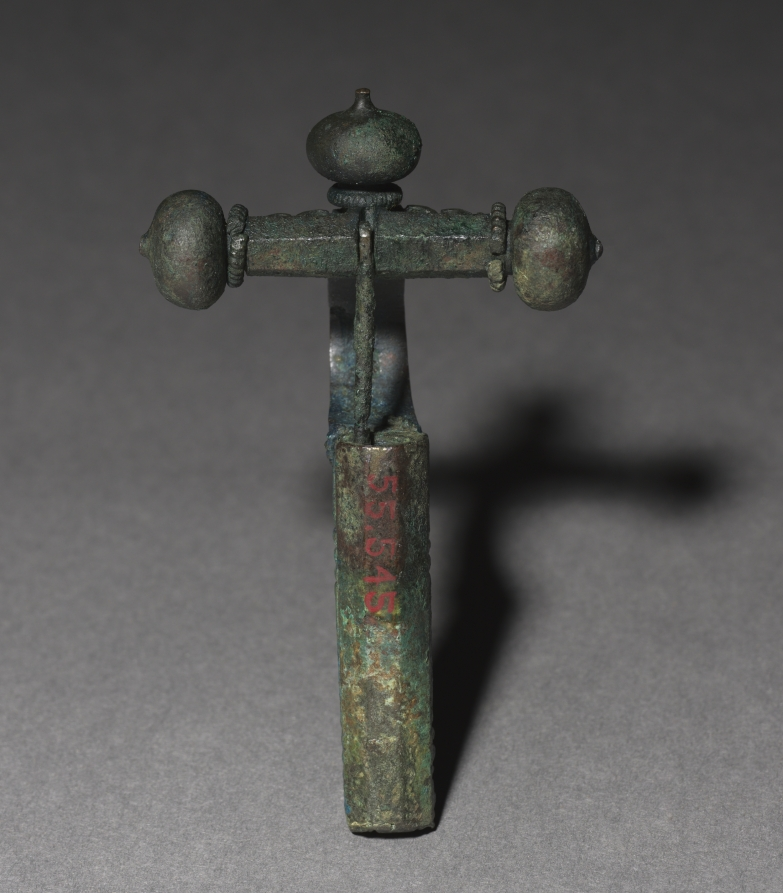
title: Crossbow Fibula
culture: Gallo-Roman or Romano-British, Migration period, 4th century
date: c. 350–400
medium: bronze, gilt-bronze, silver, and niello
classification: Jewelry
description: A fibula was a garment clasp that functioned somewhat like a modern safety pin. Since buttons were not used in antiquity, fibulae were used to keep a cloak closed. They were worn by both men and women, commonly on the right shoulder, and produced in various sizes and shapes. Because they were highly visible accessories, they often received decorative gilding, inlay decoration, or "onion"- shaped domes. Crossbow fibulae were introduced by the Romans and are named for their resemblance to the weapon. Decorative and technical features of this group suggest they may have been made in Roman-occupied Britain.